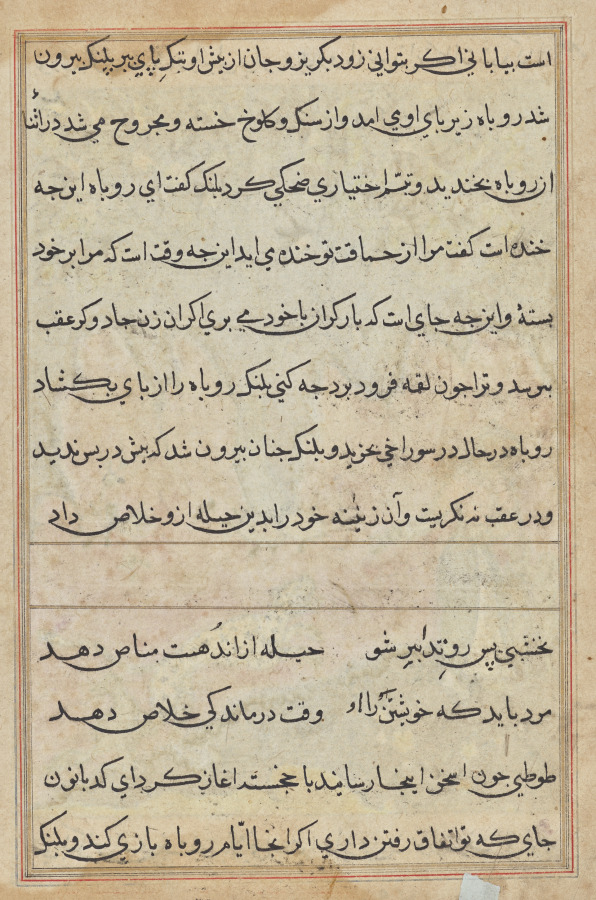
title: Page from Tales of a Parrot (Tuti-nama): text page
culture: Mughal India, court of Akbar (reigned 1556–1605)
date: c. 1560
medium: gum tempera, ink, and gold on paper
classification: Painting